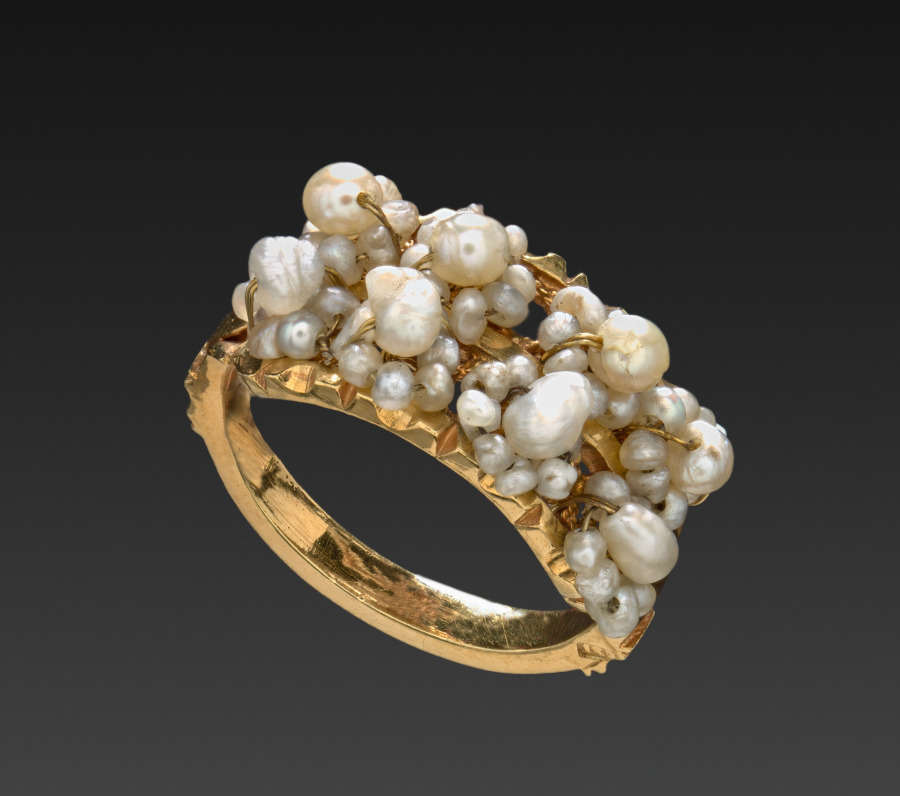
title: Ring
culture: Italy, late 19th century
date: late 1800s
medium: gold band set with seed pearls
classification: Jewelry